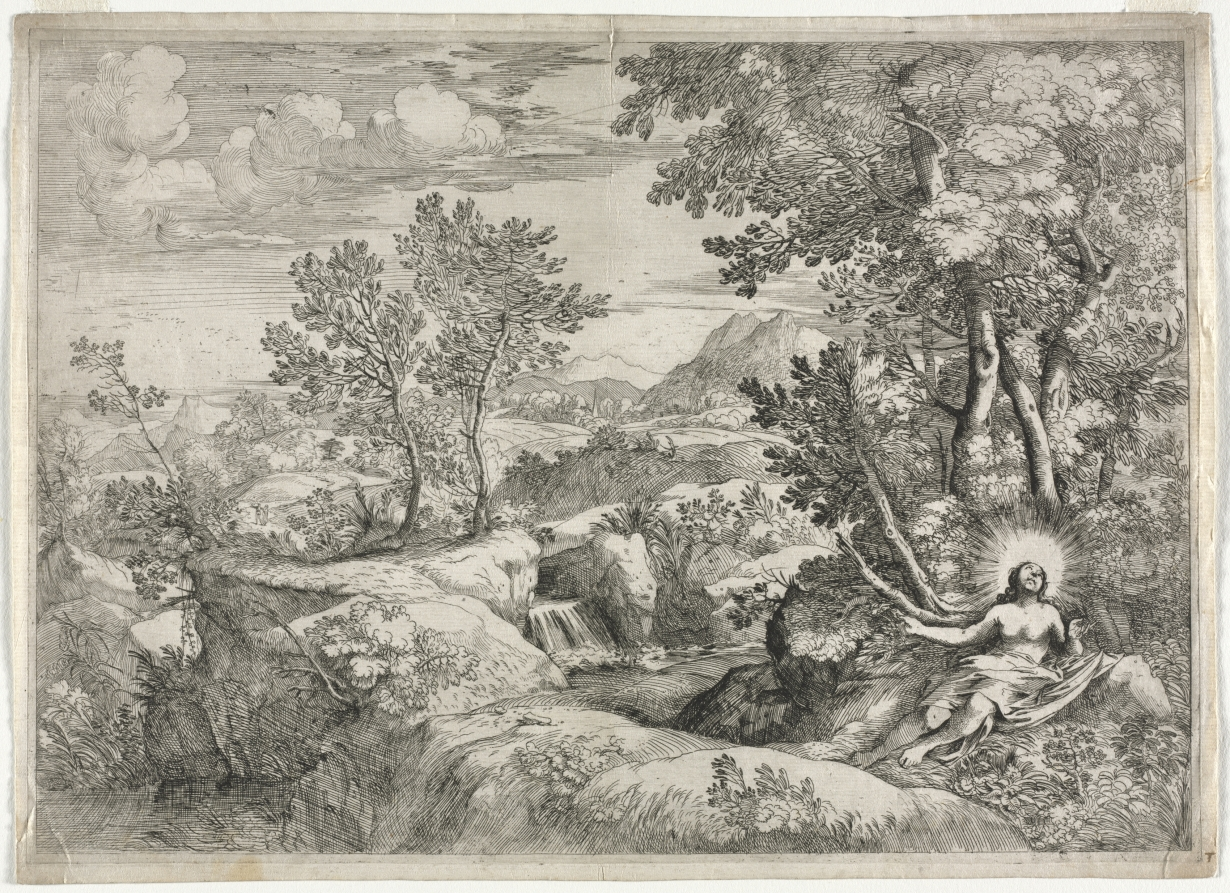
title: The Penitent Magdalen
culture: Italy, 17th century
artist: Giovanni Francesco Grimaldi (Italian, 1606–1680)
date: 1640–60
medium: etching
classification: Print